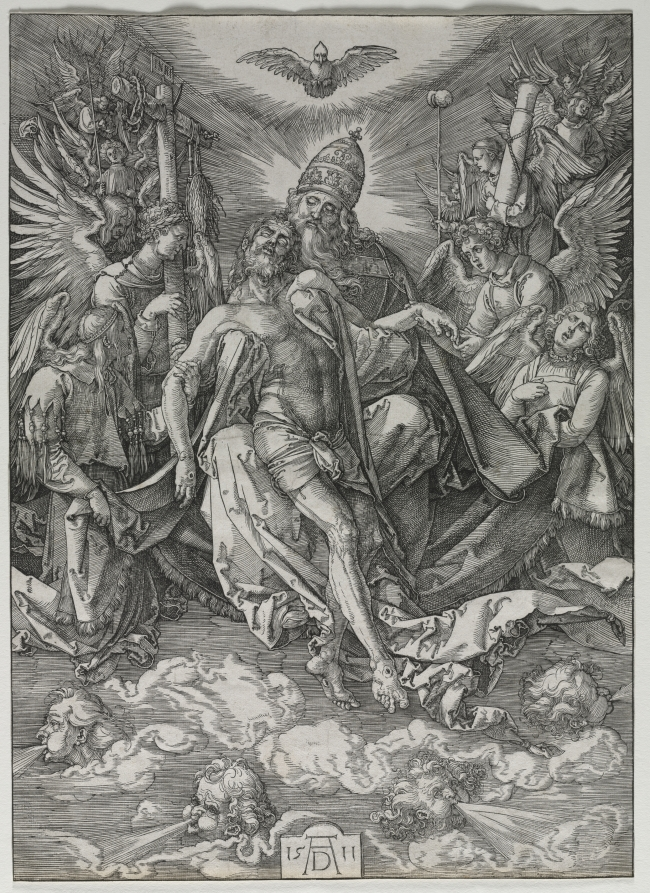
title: The Holy Trinity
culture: Germany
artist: Albrecht Dürer (German, 1471–1528)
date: 1511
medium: woodcut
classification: Print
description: The Holy Trinity represents the pinnacle of Dürer's achievement in woodcut. Using a system of parallel lines, crosshatching, and dashes of varying densities, he attained a wide range of tone and an extremely subtle representation of three-dimensional forms and spatial depth. In addition, he utilized white areas of the paper to heighten parts of the composition for an intensely dramatic effect.